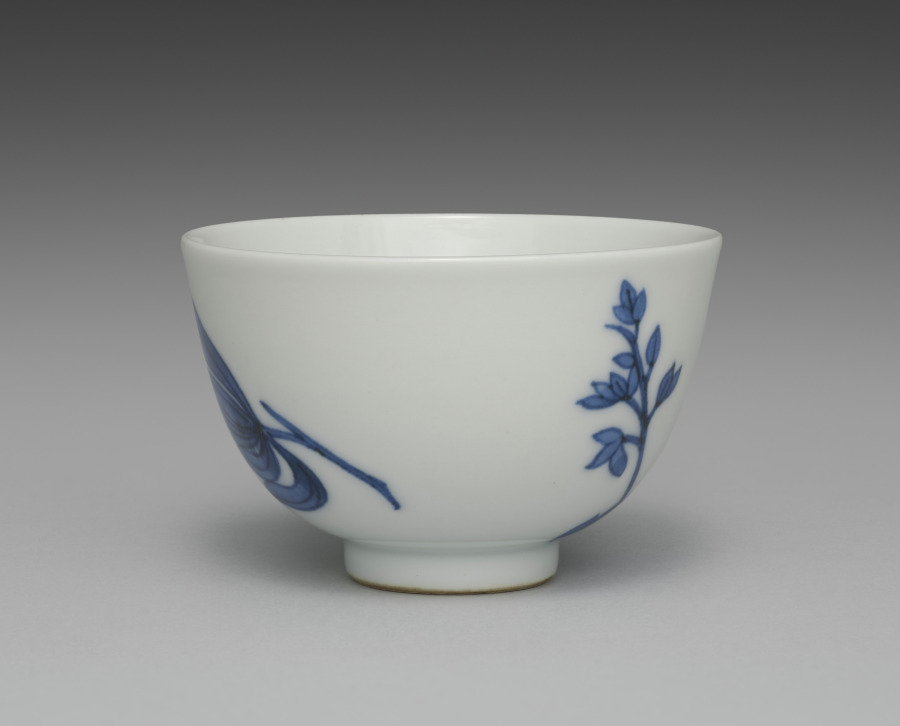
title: Teacup from Tea Set with Orchids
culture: Japan, Meiji period (1868–1912)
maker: Seifū Yohei III (Japanese, 1851–1914)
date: c. 1893–1914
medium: Porcelain with underglaze blue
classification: Ceramic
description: Although the teapot here is stored in a separate box from the five cups, these six pieces may once have been part of a tea set that included other tools such as a water cooler. The teacups have orchid flowers on both sides in underglaze blue, as well as a blue band inside the footring. The teapot has the same design and a blue band painted around the bottom of the lid’s knob. The cups’ long wood storage box is stamped on the exterior, over the lid and base, with a small red seal reading “Satō.” The same seal appears on five small squares of yellow textile, one placed in the bottom of each compartment in the teacup storage box. These are additional to the customary yellow cloths stamped with a “Seifu” seal. Interestingly, four of the Seifū cloths are stamped with an ovoid seal, while the remaining cloth, which is a slightly lighter color, has an unusual seal that is not quite gourd-shaped and with the fū of Seifū in a stylized, unrecognizable form. The teapot has its own box with a Satō seal and is wrapped with an orange textile stamped with the same unusual Seifū seal. A set with a very similar surface design is in the Brooklyn Museum. The Brooklyn set has a water cooler and a small pitcher, in addition to the teapot and cups, and all are in a single storage box. This box records the tea tools as made with kanpakuji, or “bright-jewel white porcelain,” counted among Yohei III’s most important inventions, and carved images. In fact, both sets have a white surface much closer in coloration to the cool white of porcelain clay used in Kyoto at the time, and the designs are simply painted. The Brooklyn set was thus likely mismatched at some point with a box intended for another tea set. Nonetheless, the box may have helped prevent the set’s original components from being dispersed, and the set itself provides insight into how the other tools from the present set may have looked.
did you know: This tea set with orchids has a side-handled pot called a kyūsu, used for steeping, straining, and serving tea.